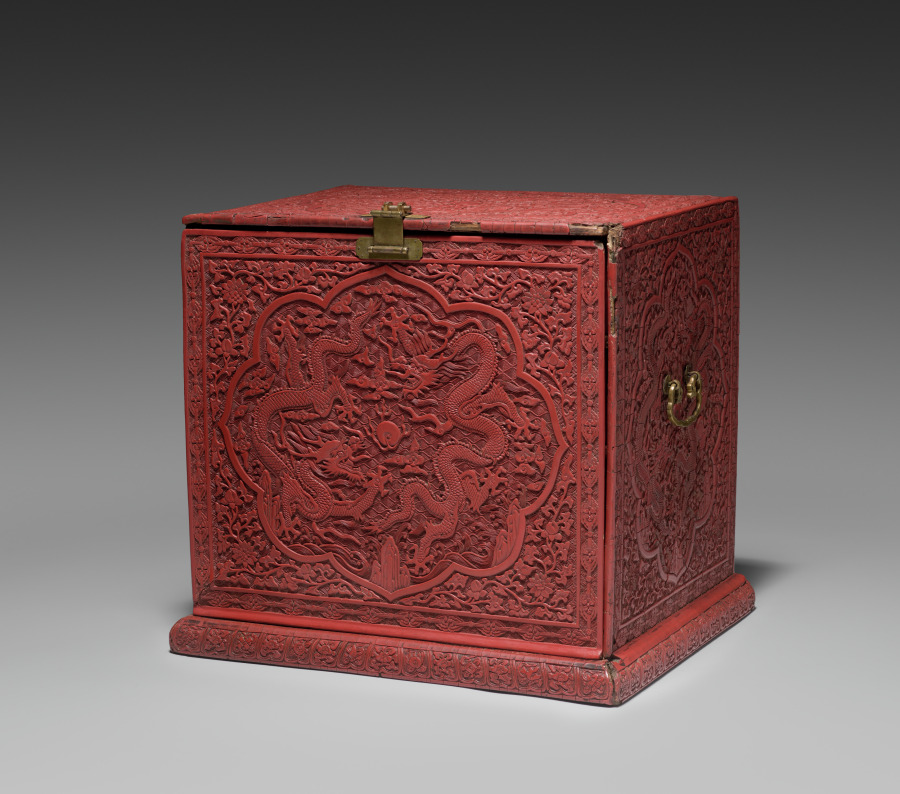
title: Tihong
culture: China, Ming dynasty (1368-1644), Wanli reign (1572-1620)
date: 1585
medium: carved cinnabar lacquer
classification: Lacquer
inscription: 大明萬曆乙酉年製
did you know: An inscription on the base of the chest dates it to 1585.